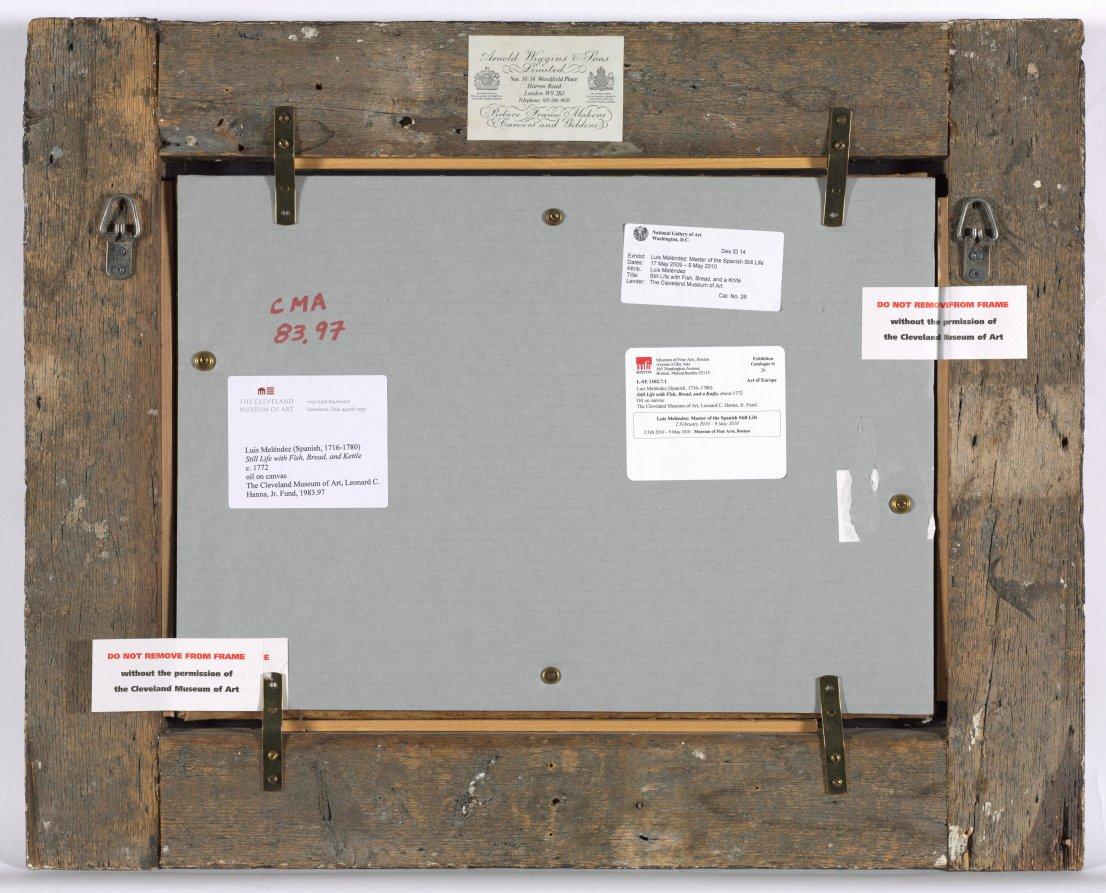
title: Still Life with Fish, Bread, and Kettle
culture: Spain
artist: Luis Meléndez (Spanish, 1716–1780)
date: c. 1772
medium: oil on canvas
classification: Painting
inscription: Signed lower right: "L.M.[z]"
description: During the 1760s, after painting portraits and portrait miniatures with his father, Meléndez began to specialize in still lifes. Active mainly in Madrid, he is regarded as the finest Spanish still-life painter of the 18th century, but he spent much of his life in poverty.